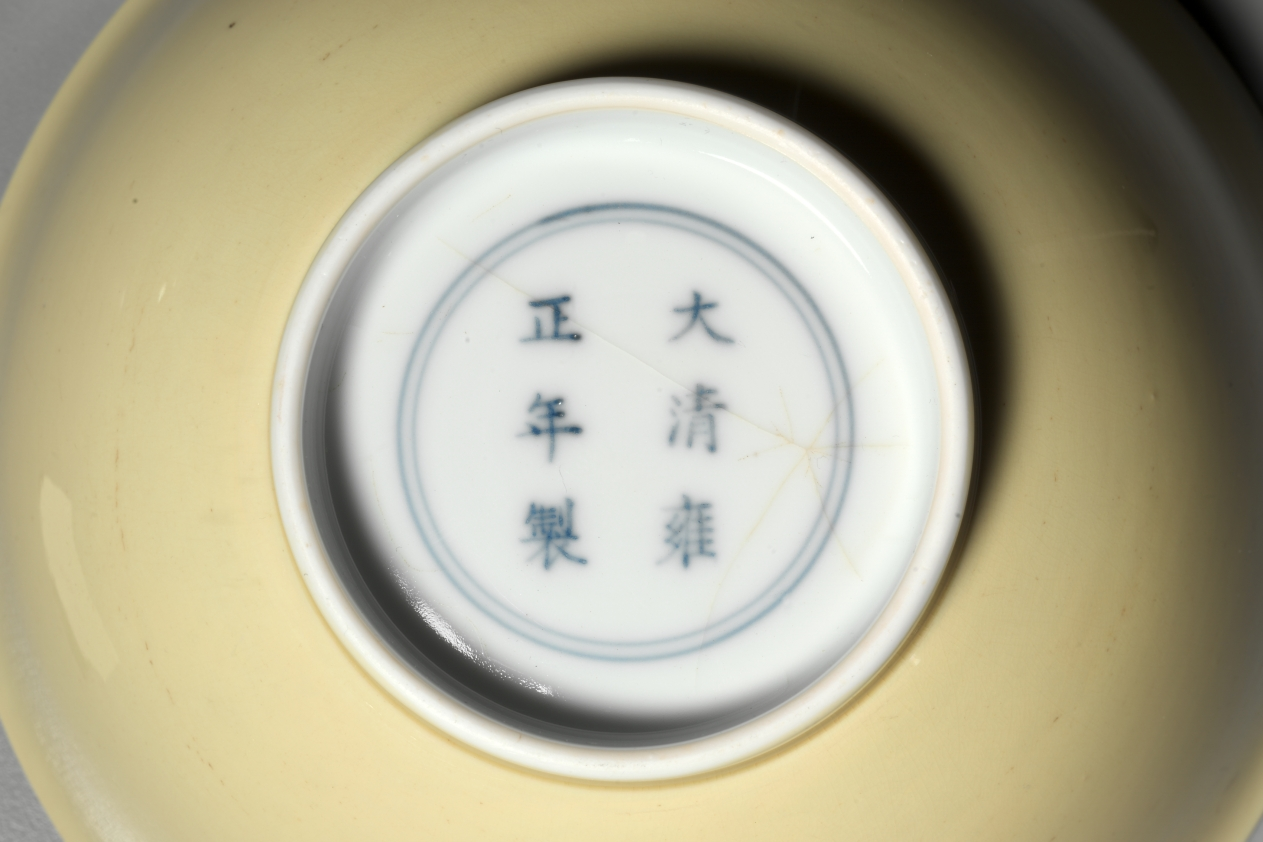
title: Bowl with Yellow Glaze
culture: China, Qing dynasty (1644-1911), Yongzheng mark and reign (1723-35)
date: 1723–1735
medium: glazed porcelain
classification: Ceramic